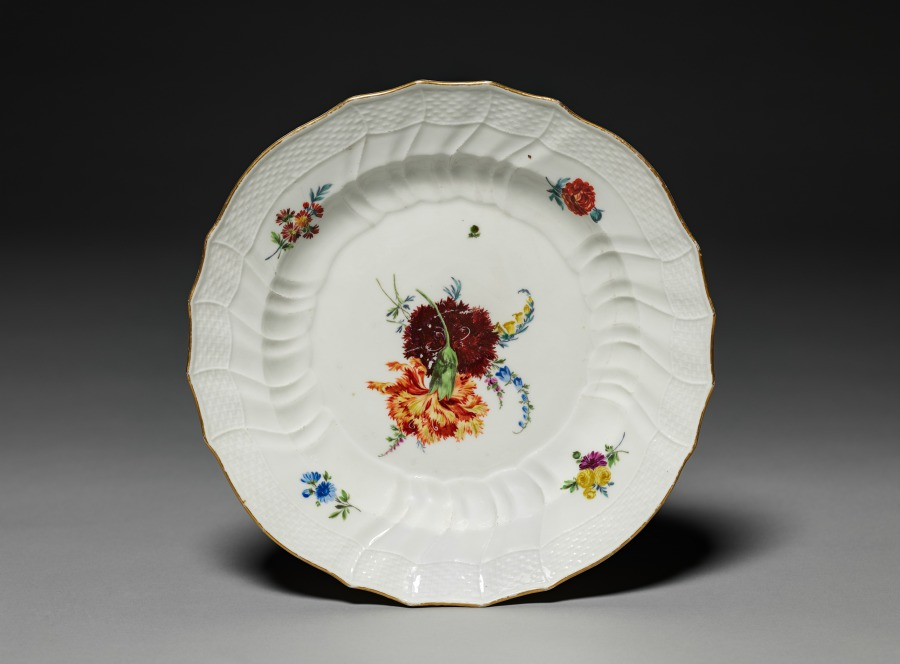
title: Plate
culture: Germany, 18th century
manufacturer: Meissen Porcelain Factory (German, est. c. 1710)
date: 1756–1780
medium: porcelain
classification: Ceramic